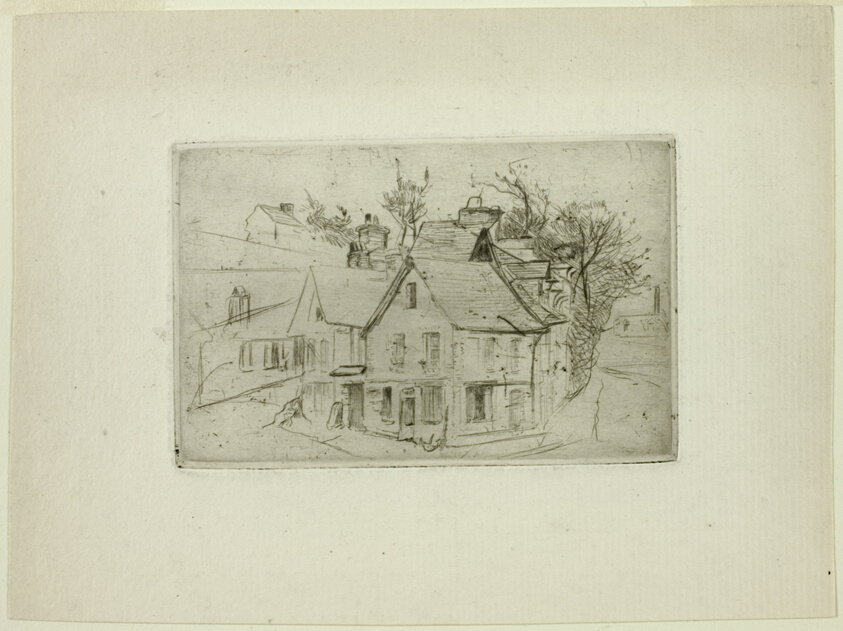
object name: Print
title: Street Corner in a Village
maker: Henri-Emile Lessore (French, 1830-1895)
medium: Drypoint on cream laid paper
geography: France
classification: drypoint; print; prints and drawing